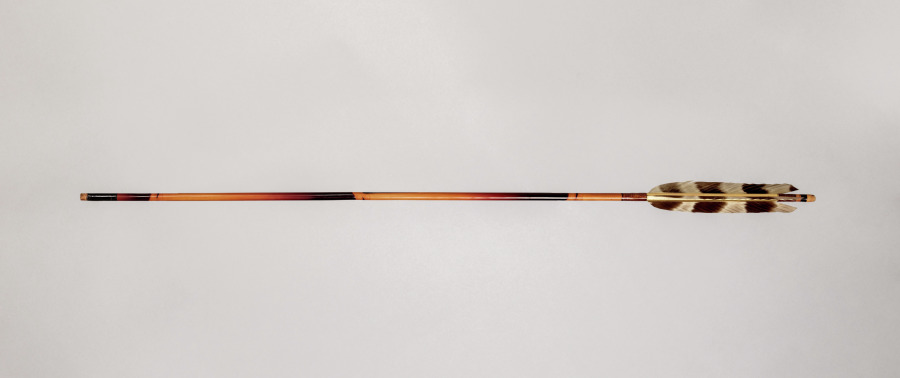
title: Arrow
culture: Japan, Edo period (1615–1868) to Meiji period (1868–1912)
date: 1800s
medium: bamboo shaft tipped with ivory point and heeled with feathers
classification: Arms and Armor